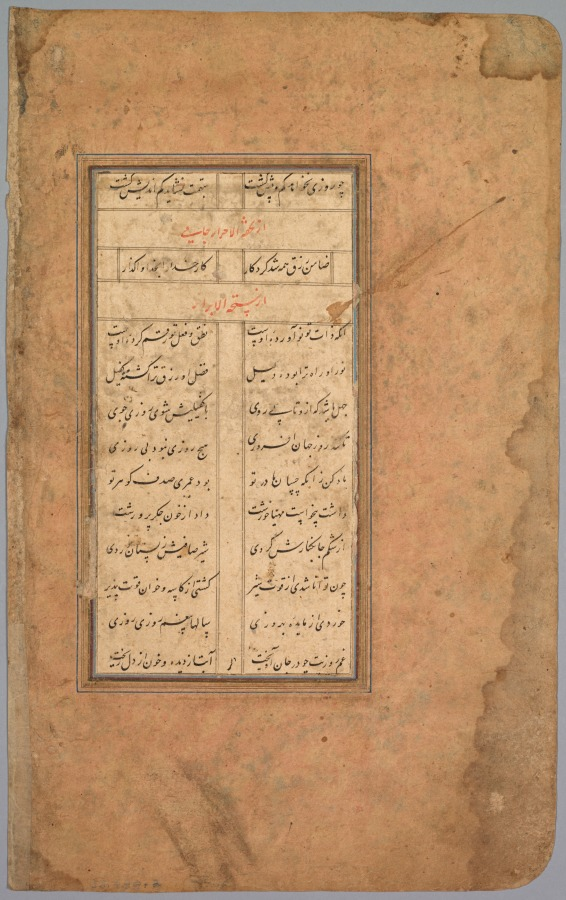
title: School Exercise Alphabet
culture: India, Mughal Dynasty (1526-1756)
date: 18th century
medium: ink on paper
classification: Manuscript